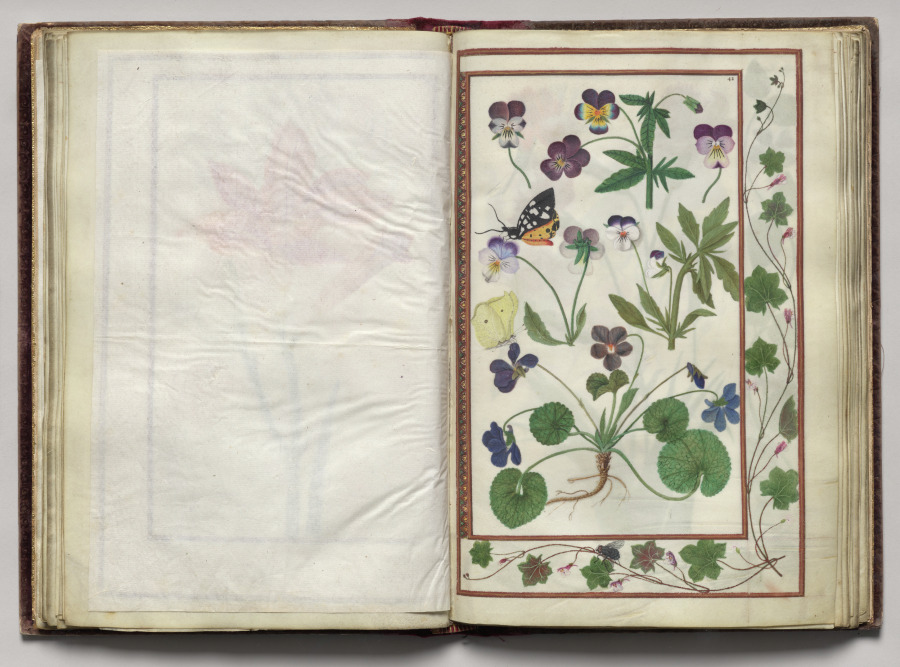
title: Florilegium (A Book of Flower Studies)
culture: France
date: 1608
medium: bound manuscript of 48 leaves, 77 drawings; watercolor, ink, silver, and gold over occasional traces of pencil, on vellum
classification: Bound Volume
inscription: Dated: Poitiers 1608 (on frontispiece) Signed: On frontispiece in black ink, lower right: Van Kuyk Notation on drawing: Frontispiece: in pencil, lower margin: * élève de Van Kessel, peintre flammand (* in pencil also appears in front of Van Kuyk's name).